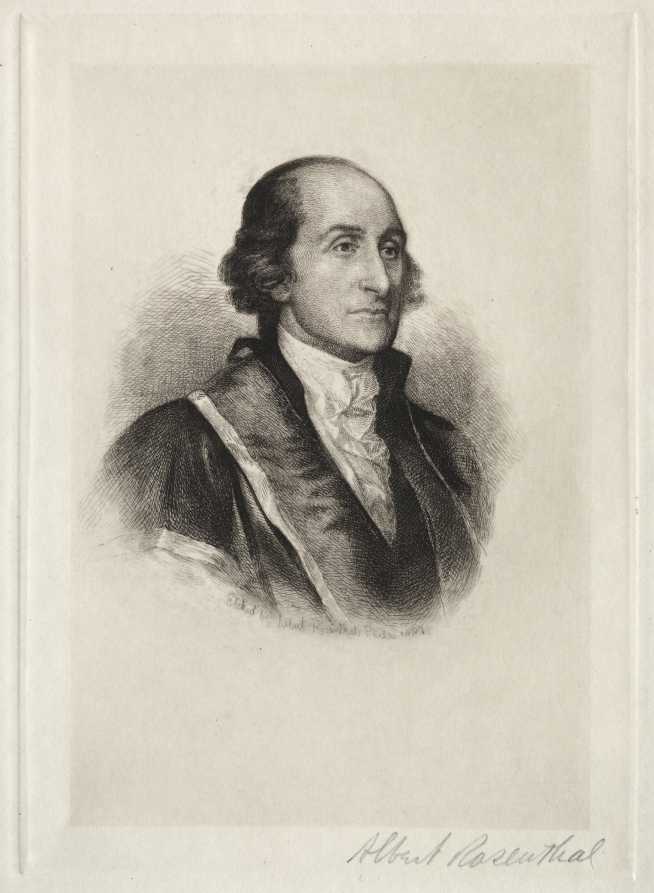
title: John Jay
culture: America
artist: Albert Rosenthal (American, 1863–1939)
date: 1887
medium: etching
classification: Print